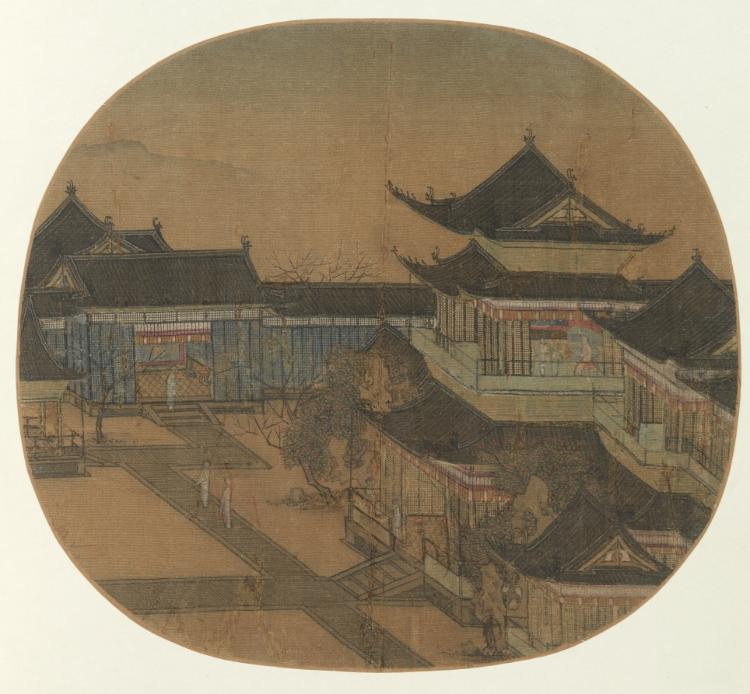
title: A Palace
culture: China, Yuan dynasty (1271-1368)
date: 1271–1368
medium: Album leaf; ink and color on silk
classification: Painting